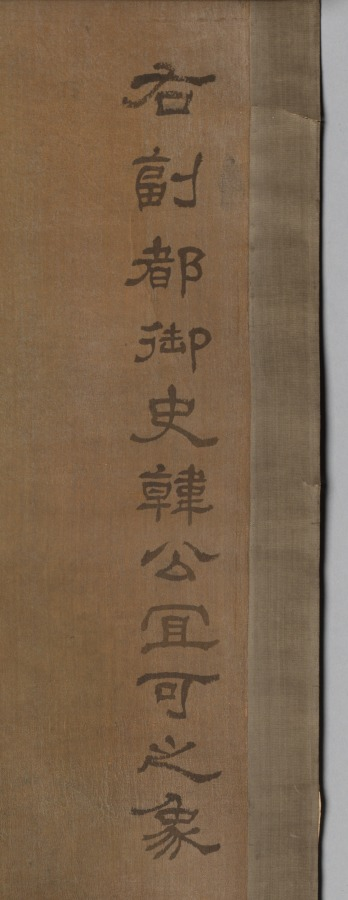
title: Han Yige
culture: China, Ming dynasty (1368–1644)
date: c. 1368–1644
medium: hanging scroll; color on silk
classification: Painting